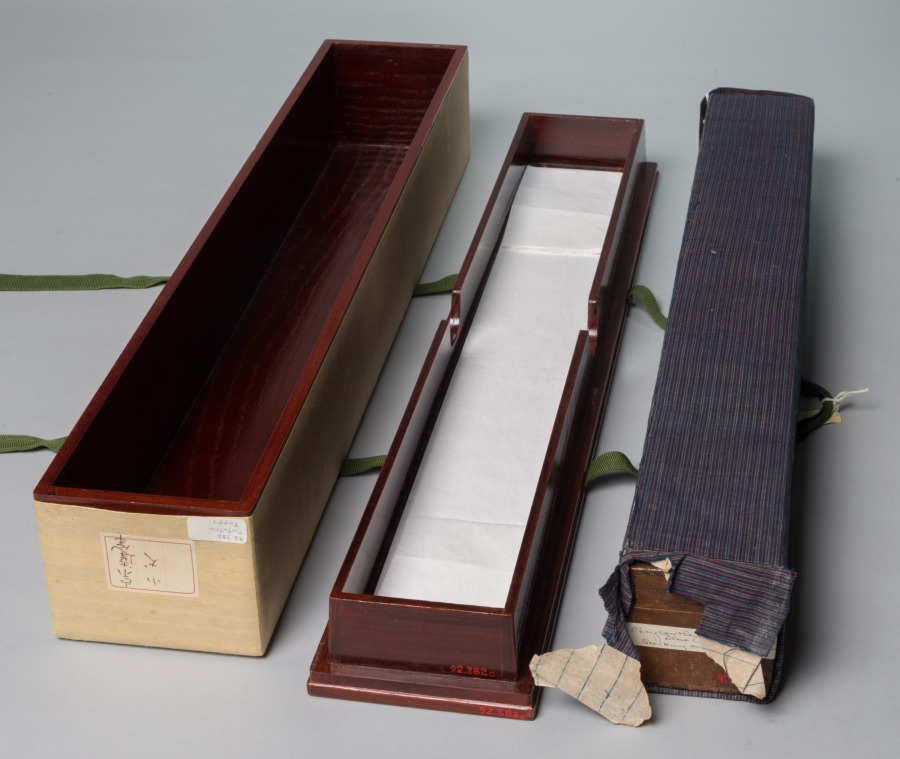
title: Puppy with Dandelions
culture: Japan, Edo period (1615–1868)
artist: studio of Tawaraya Sōtatsu (Japanese, c. 1570–c. 1640)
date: 1600–1640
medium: hanging scroll; ink on paper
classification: Painting